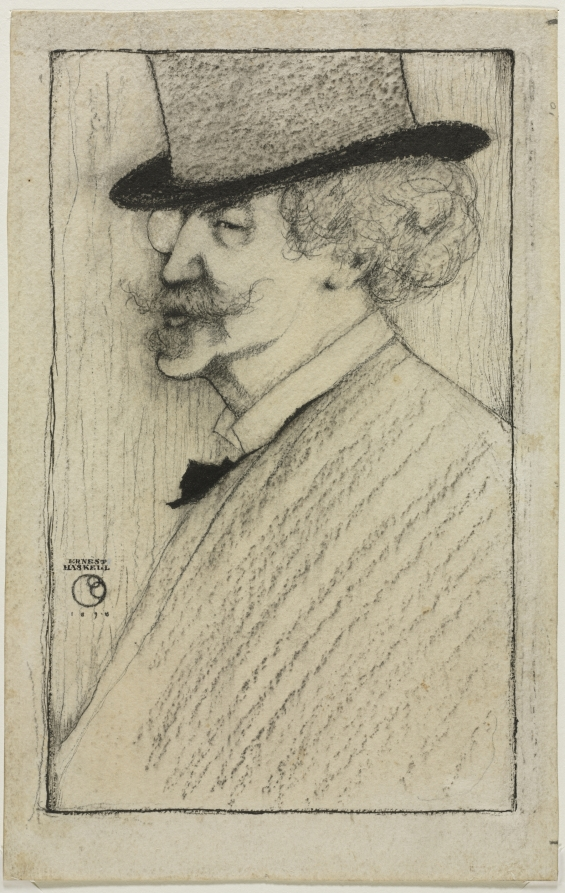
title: James McNeill Whistler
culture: America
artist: Ernest Haskell (American, 1876–1925)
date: 1898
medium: ink and charcoal and black ink and black wash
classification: Drawing